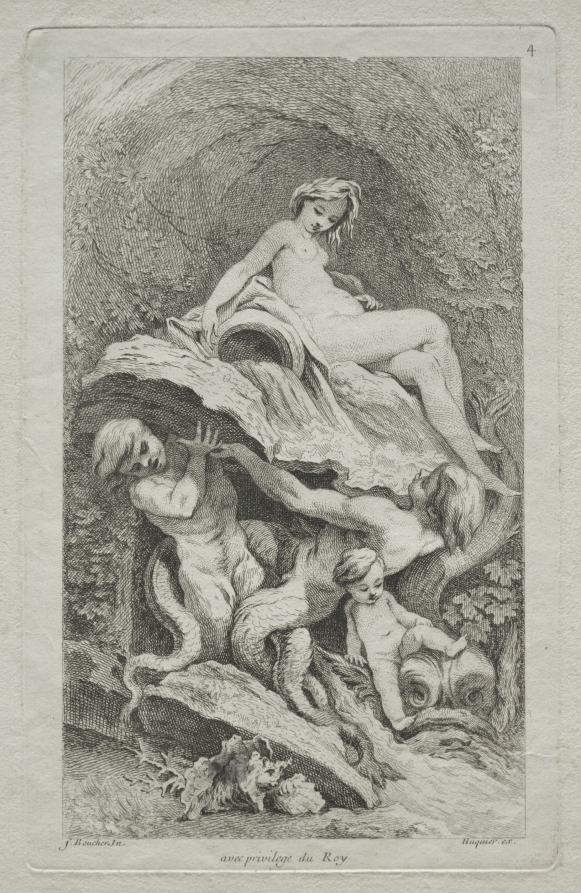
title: Book of Fountains: No. 4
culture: France, 18th century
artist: Gabriel Huquier (French, 1695–1772)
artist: after François Boucher (French, 1703–1770)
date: c. 1736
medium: etching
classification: Print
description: French prints promoting l’art rocaille (rock and shell art) or goût pittoresque (picturesque taste) quickly migrated throughout Europe and influenced the development of an international rococo style. The drawing on the left is one of Boucher’s designs for a printed suite of ornamental fountains, two of which are on display here. Boucher melds the shapes of animals, rocks, shells, mythological beasts, and humans into fanciful cascades with a sense of unstable equilibrium.